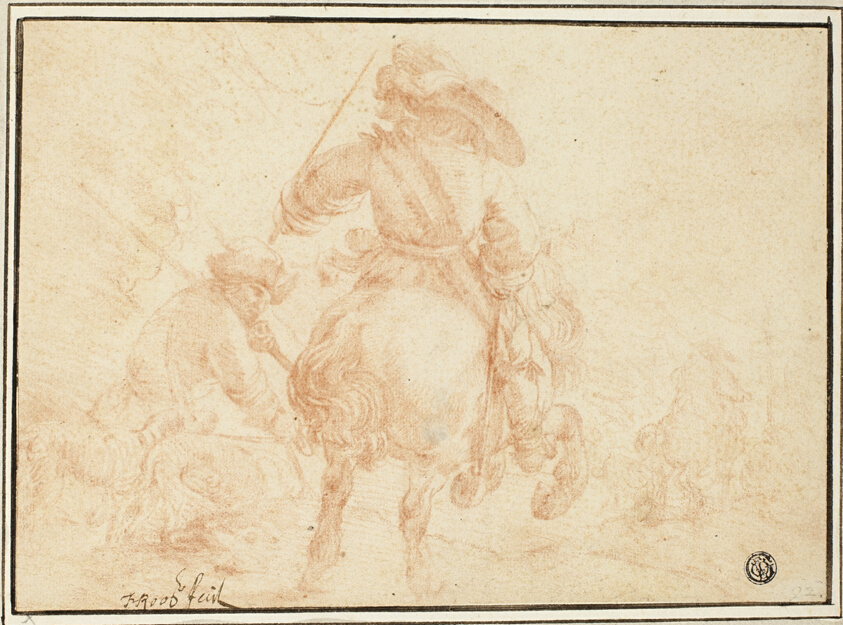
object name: Drawing and Watercolor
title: Soldiers on Horseback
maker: Johann Heinrich Roos (German, 1631-1685); or Theodore Roos (German, 1638-c. 1698)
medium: Red chalk counterproof on ivory laid paper, laid down on ivory laid card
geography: Germany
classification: chalk; drawings (visual works); prints and drawing